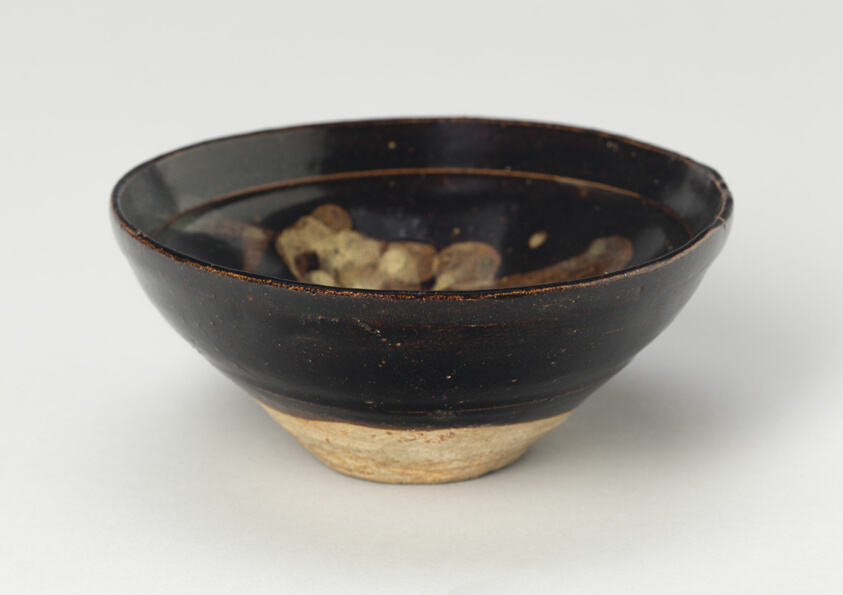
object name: Vessel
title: Bowl with Winding Strokes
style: Chinese (culture or style)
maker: China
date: Southern Song (1127–1279) or Yuan dynasty (1271–1368), 12th/14th century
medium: Jizhou ware; light grey stoneware with dark brown glaze and painting in overglaze buff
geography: China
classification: bowl; dish (vessel); ceramics; vessel